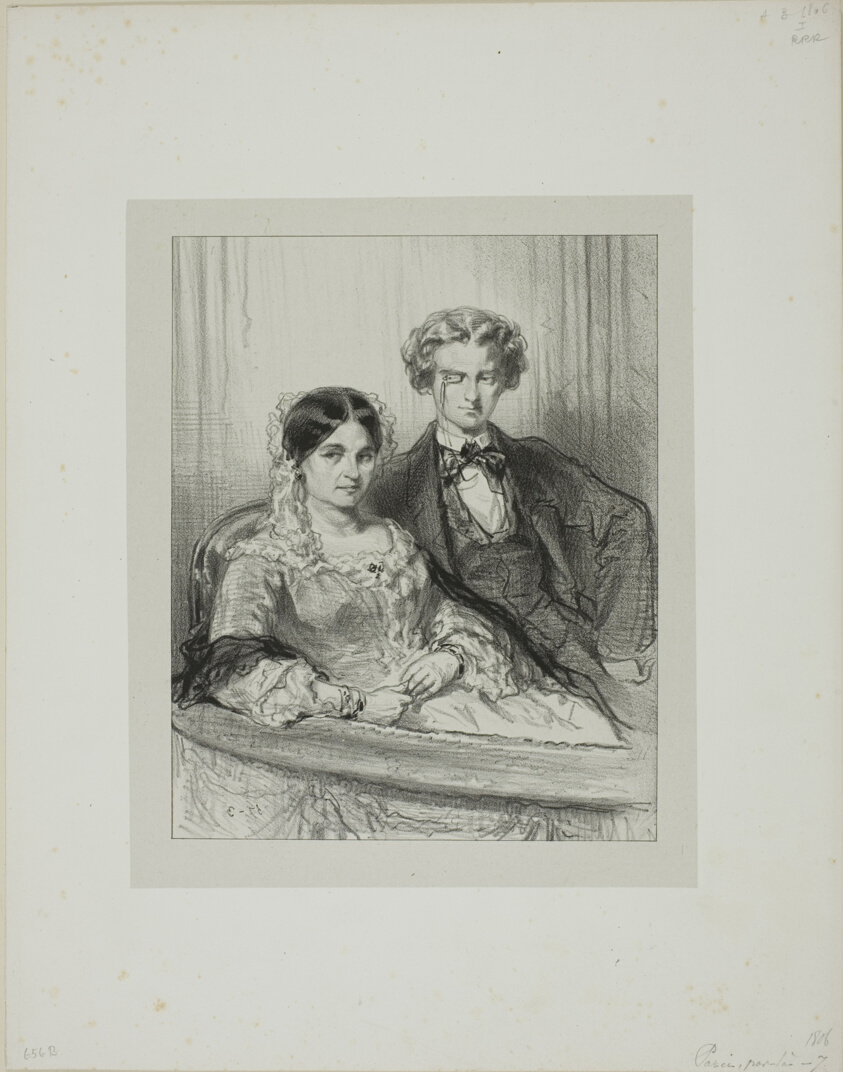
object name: Print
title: Par-ci, par-là: Phèdre au Théâtre-Francais...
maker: Paul Gavarni (French, 1804-1866)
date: 1857–58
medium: Lithograph in black on light gray China paper, laid down on ivory wove paper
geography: France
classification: lithograph; print; prints and drawing